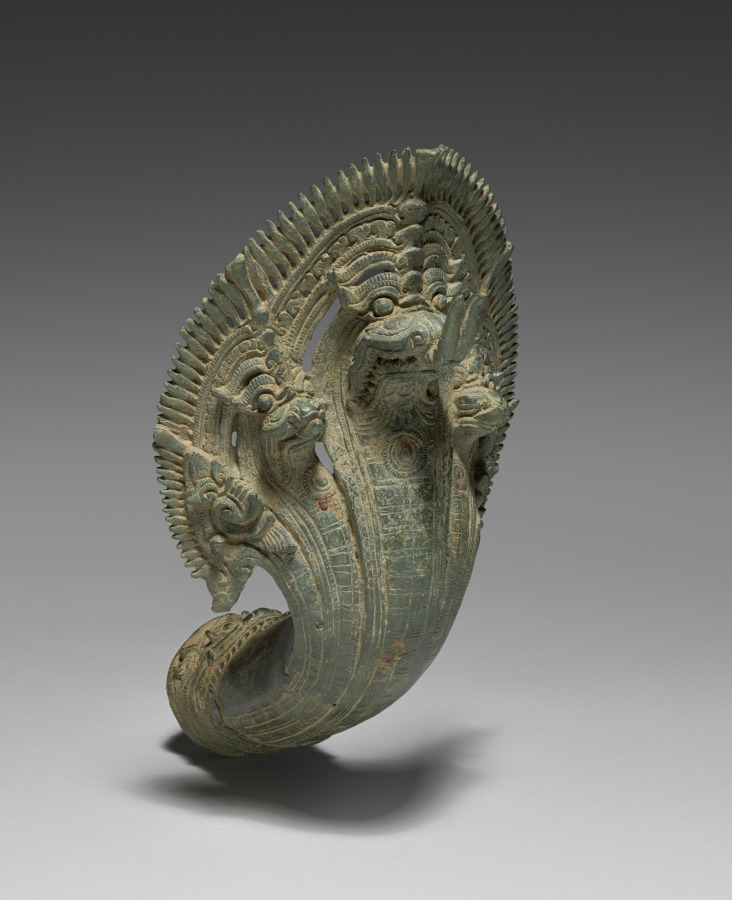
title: Naga Finial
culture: Cambodia, Angkor Wat period, 1100s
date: 1100s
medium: bronze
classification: Metalwork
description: When members of the royal family or priesthood traveled in a public festival procession or to a temple to make offerings or participate in a ceremony, they would be carried in a palanquin, or a covered litter. Portable objects of veneration, such as bronze images or a sacred fire, were also carried on palanquins. The palanquins had wooden poles, hanging seats or raised platforms, and bronze fittings cast in intricate forms and gilt, lending the palanquins a sumptuous quality. The royal palanquins were typically fitted with multiheaded, serpent-shaped finials at the ends of the poles and corners of the elevated platforms. Naga means serpent in Sanskrit, a language from India selectively appropriated by the Khmer in Cambodia. In their own indigenous mythology, the Khmer people trace their descent from a naga princess and a prince from the island of Java who journeyed to Cambodia. The naga remains a potent emblem for the Khmer nation to this day; it is ubiquitous on Cambodian monuments.